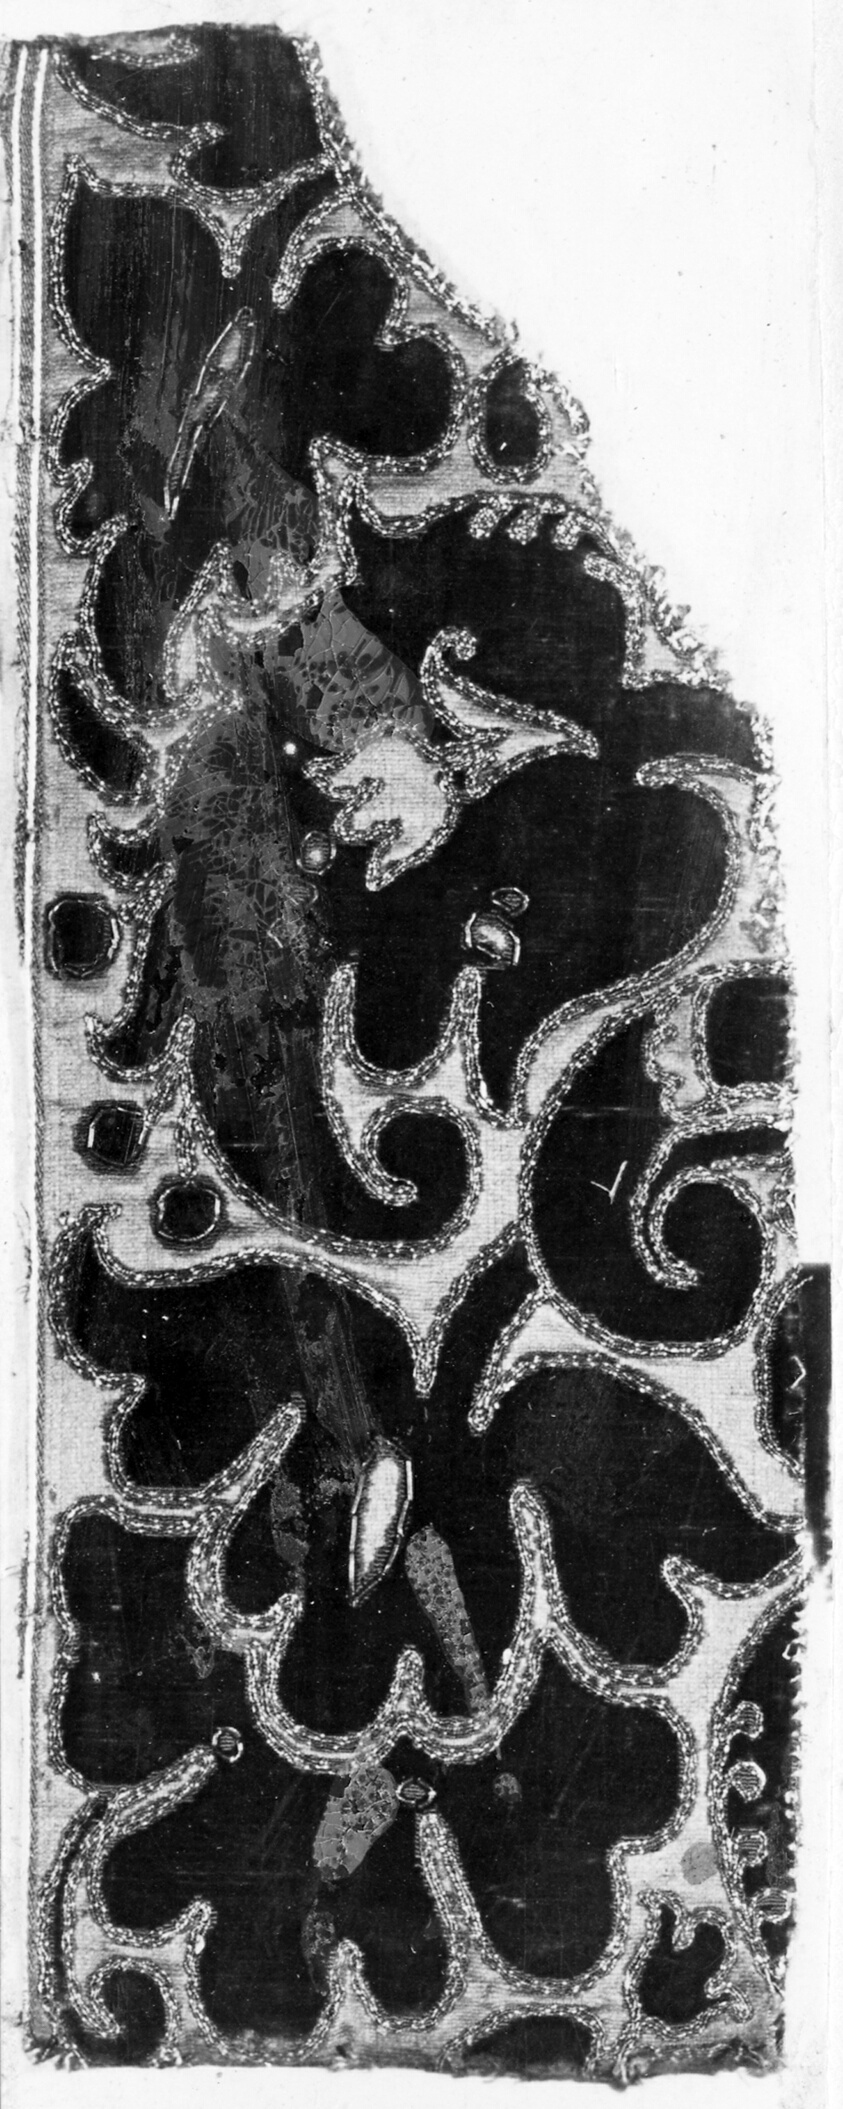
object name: Textile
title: Fragment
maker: Italy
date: Mid–17th century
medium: cisele voided satin velvet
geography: Italy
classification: textile; weaving - velvet